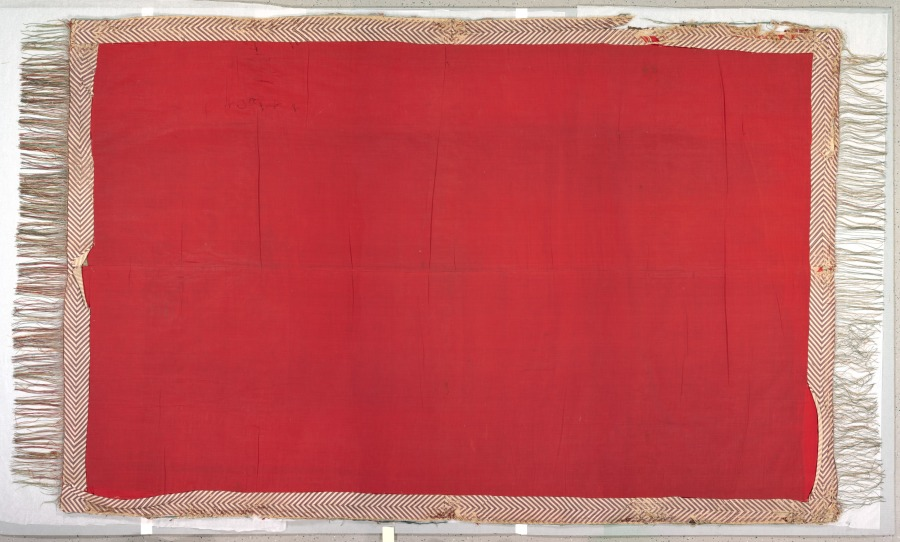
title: Floorspread with medallion pattern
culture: India, Gujarat, probably Ahmedabad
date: 1650–1700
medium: velvet, solid pile and pile-warp substitution: silk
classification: Velvet